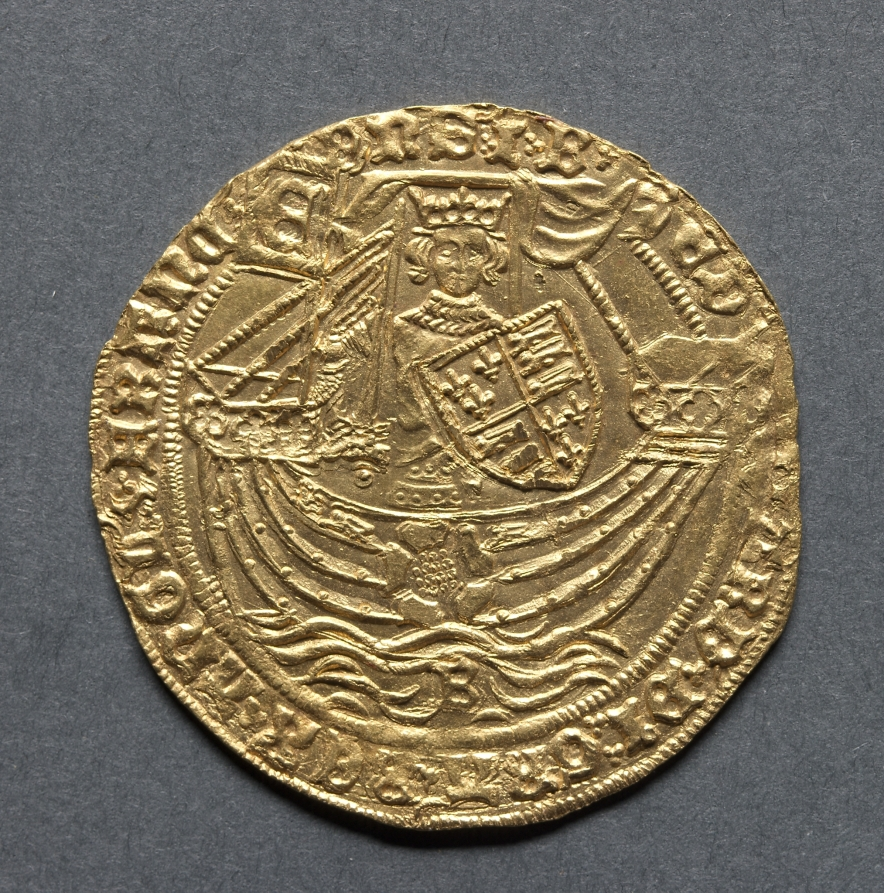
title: Ryal: Edward IV in Ship with a Shield of Arms and Rose (obverse)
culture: England, Edward IV (first reign 1461-1470, second reign 1471-1483)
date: 1464/5–1470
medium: gold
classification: Coins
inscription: ЄD · · WΛRD’ · DI · GRΛ’ · RЄX · ΛNGL’ · Z · FRΛn · · C DNS’ · I · B’